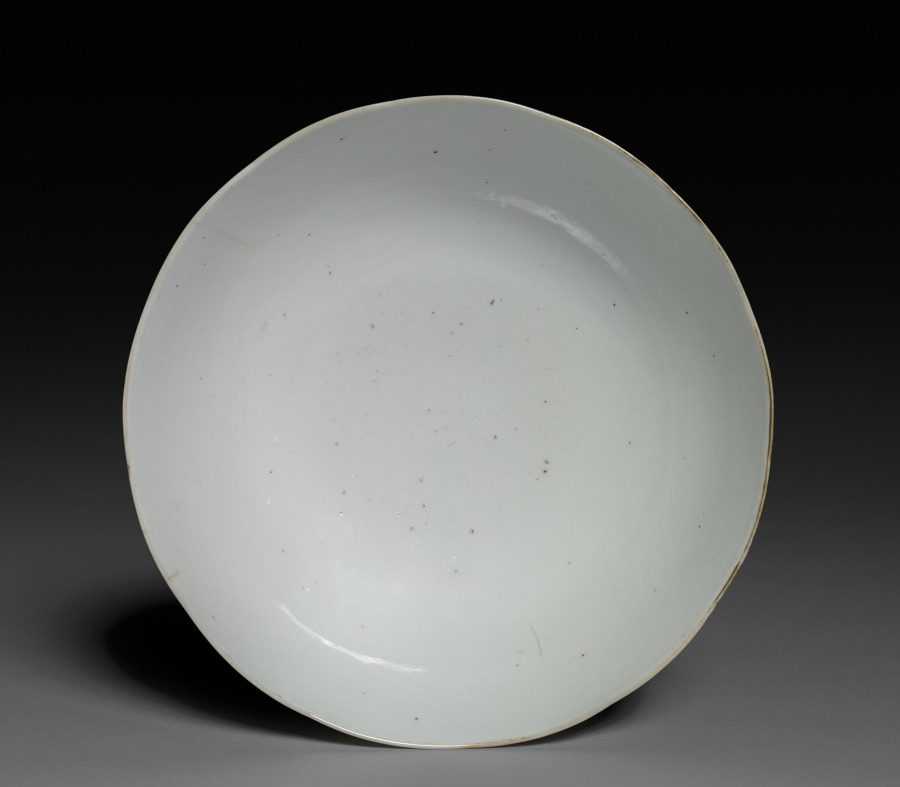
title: Bowl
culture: China, Qing dynasty (1644-1911)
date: 1821–1850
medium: porcelain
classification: Ceramic